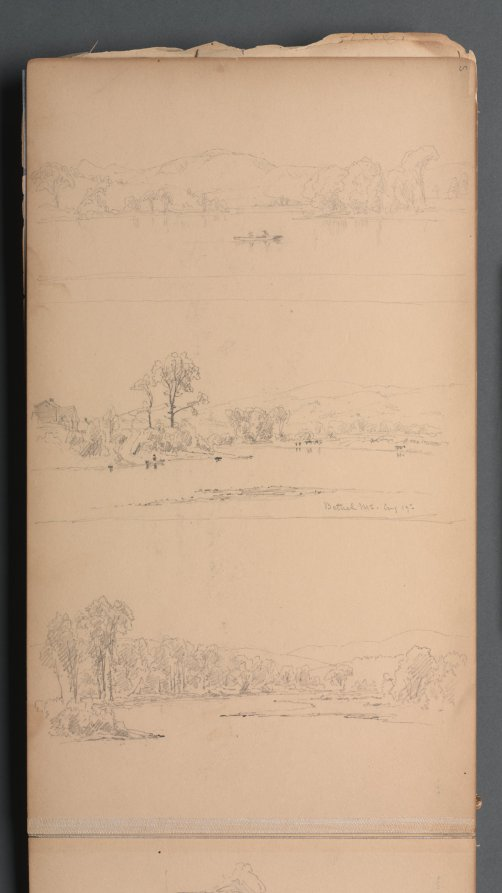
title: Sketchbook, page 05: "Bethel ME Aug 19th"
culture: America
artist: Sanford Robinson Gifford (American, 1823–1880)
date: 1859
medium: graphite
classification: Bound Volume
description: Gifford was an American landscape painter belonging to the second generation of Hudson River school artists. Based in New York City with a studio at the Tenth Street Studio Building, Gifford took annual summer trips to the Catskills, the Adirondacks, and other scenic locations in New England. This sketchbook accompanied the artist on his expedition in 1859 to New Hampshire and Maine, where he drew sites such as Dixville Notch, the White Mountains, and Peaks Island, Casco Bay. Gifford used such graphite studies as the basis for oil paintings worked up in his studio, such as A Home in the Wilderness (1866).